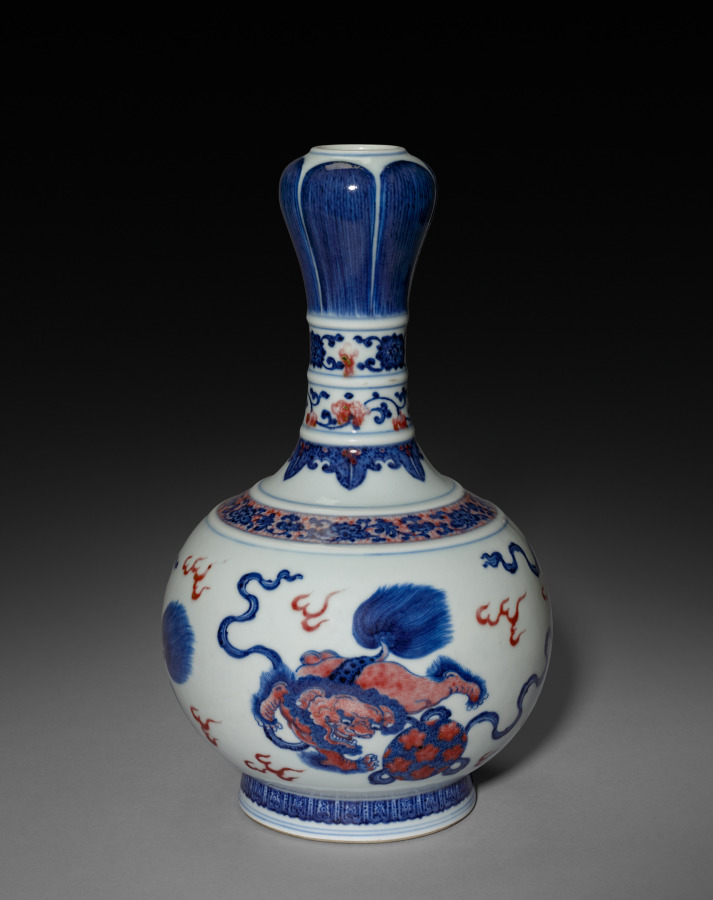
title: Bottle-shaped Vase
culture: China, Qing dynasty (1644–1911), Qianlong reign (1736–95)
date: 1736–95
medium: porcelain with underglaze decoration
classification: Ceramic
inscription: 大清乾隆年制